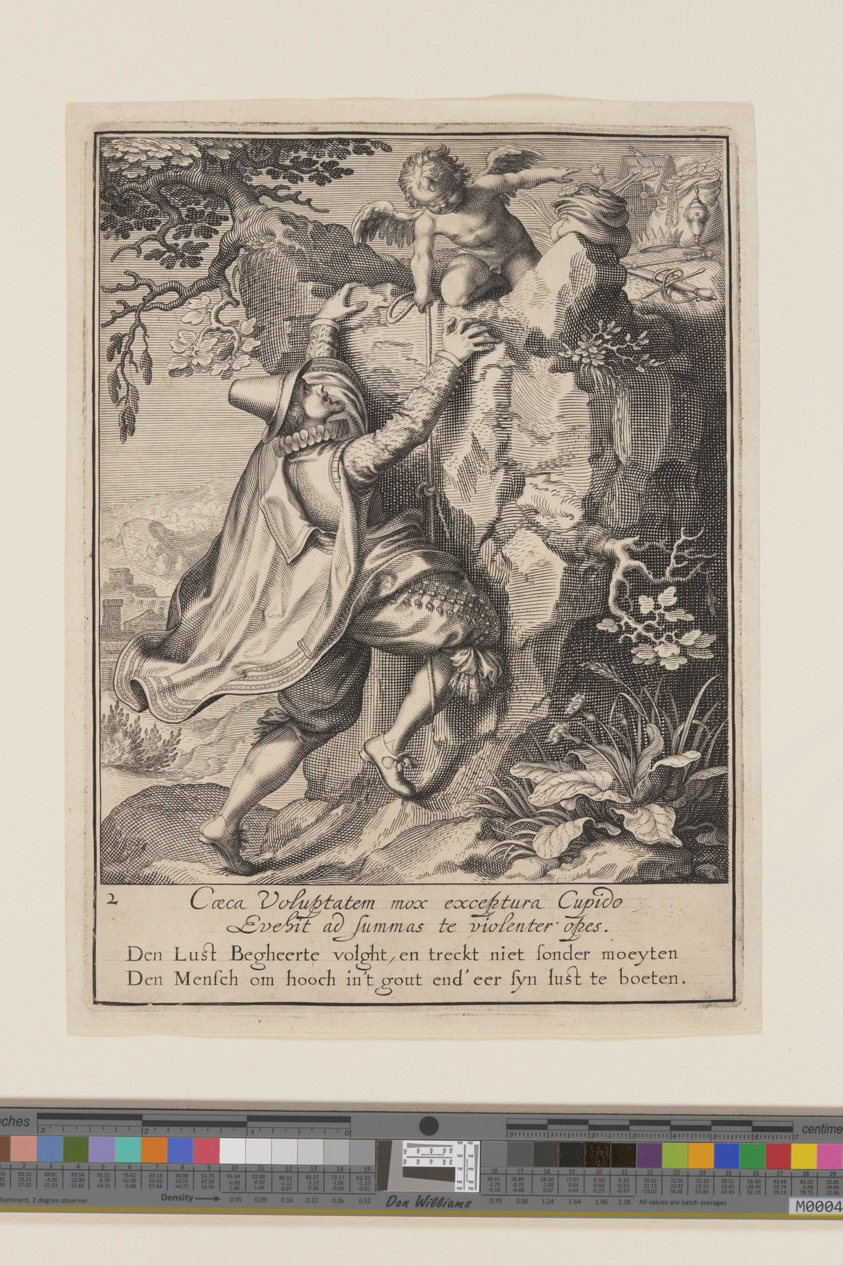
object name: Print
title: A Young Man Climbing a Hillside Aided by Cupid, from Allegory of the Misuse of Worldly Property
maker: Willem van Swanenburgh (Dutch, 1580–1612); after Maerten van Heemskerck (Dutch, 1498–1574)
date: 1609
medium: Engraving on ivory laid paper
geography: Netherlands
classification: engraving; paper; print; prints and drawing